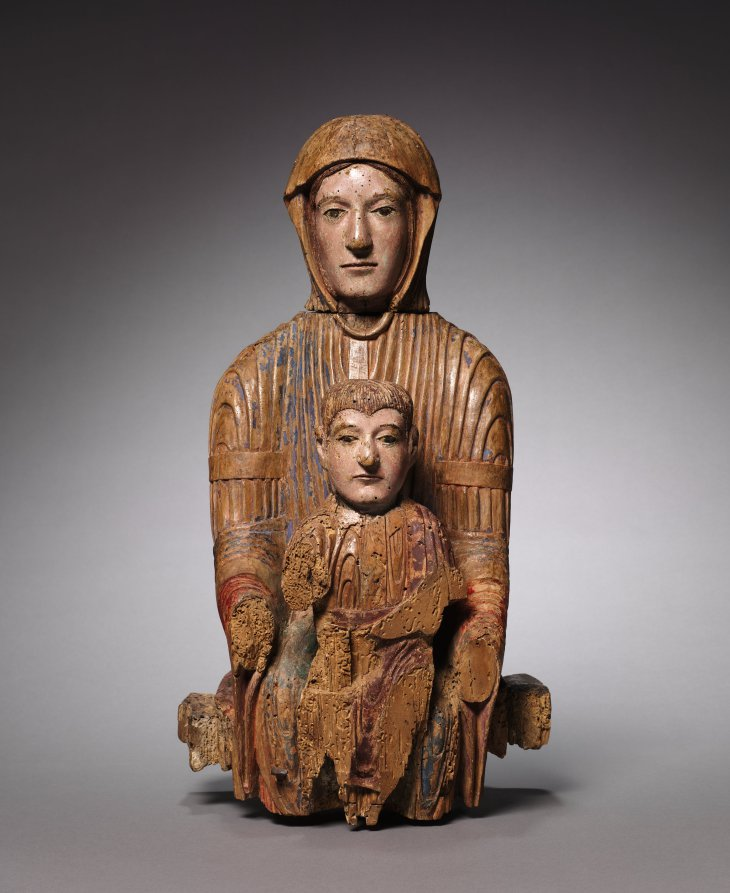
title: Virgin and Child in Majesty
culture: France, Auvergne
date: c. 1150–1200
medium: polychrome wood (walnut)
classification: Sculpture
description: This sculpture belongs to a group of early representations of the Virgin and Child known as the Sedes Sapientiae (the Throne of Wisdom). The subject embodies a complex and core Christian doctrine of the Virgin’s role in the Incarnation (the moment in which Christ became flesh) and ultimately in the redemption of humankind. Mary faces forward, her gaze toward the beholder. As she is seated on a throne, she in turn becomes the throne to the Christ child, thus symbolizing her role in giving birth not only to the human Jesus, but also to the divine Christ. The Incarnation gave Mary a unique role as principal mediator between heaven and earth, and between God and humankind. As a result, her image proliferated in art, especially after the 12th century, a period in which there was surging interest in Mary’s life and increasing devotion to her person and images. The sculpture belongs to a rare group of surviving figures produced in the Auvergne region of central France during the second half of the 12th century. These "Auvergne" Virgins are estimated to number only about 25 or 30 and are characterized by their linear, calligraphic draperies, which form beautiful swirls and contours. All such sculptures are smaller than life-size and made of wood in order to make them mobile. Evidence suggests that they were moved from altar to altar or church to church, and were frequently carried in procession within churches and town streets on Marian feast days. The heads were intentionally removable in order to "dress" them in costumes for such processions.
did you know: In this sculpture of Mary and Jesus, their heads are detachable.